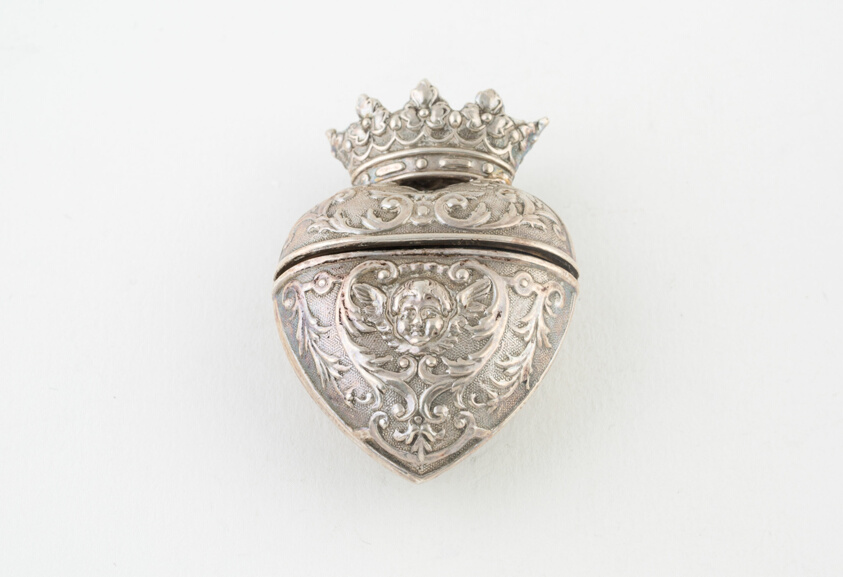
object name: Metalwork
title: Sponge Box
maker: Denmark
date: c. 1830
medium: Silver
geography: Denmark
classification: container for personal use; box; european decorative arts; metalwork; silver; decorative object/ornament